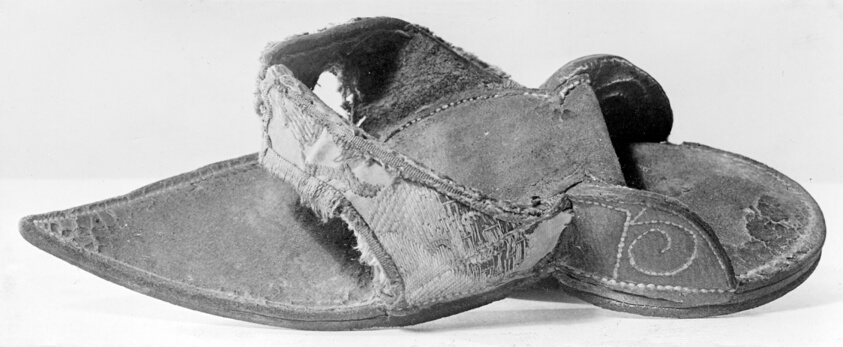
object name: Textile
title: Patten (Overshoe)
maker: England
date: 1700/50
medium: Silk and gilt-metal-strip-wrapped silk, plain weave with supplementary brocading wefts over leather; edged with silk, plain weave; heel of leather with linen, running stitches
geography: England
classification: textile; costume accessory - shoe; shoes - misc